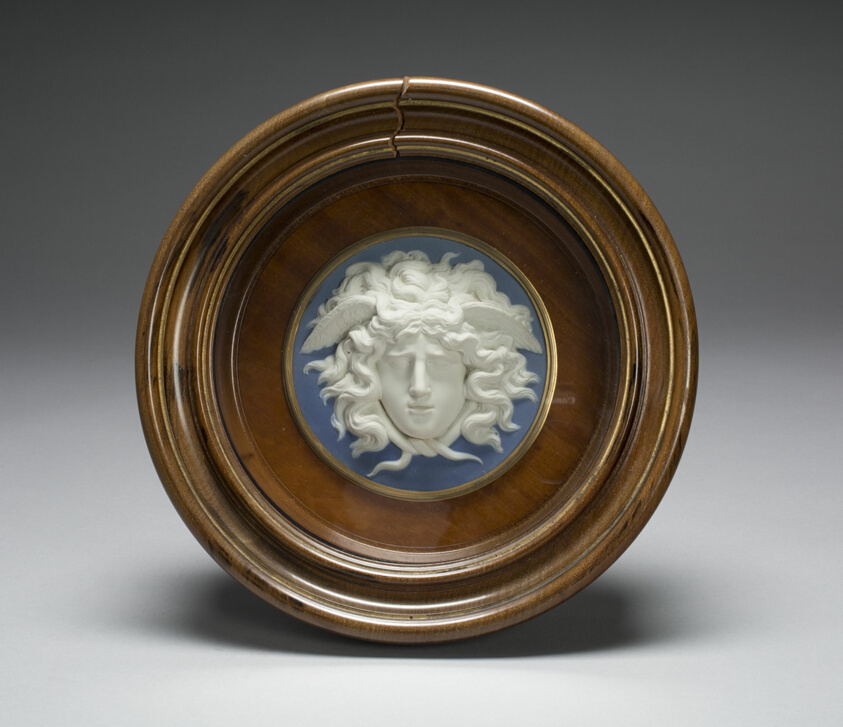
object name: Ceramics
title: Medusa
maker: Wedgwood Manufactory; England, founded 1759; Modeled by John Flaxman, Jr.; English, 1755-1826; Etruria, Staffordshire, England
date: 1775/80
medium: Stoneware (jasperware), gilded wooden frame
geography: Etruria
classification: sculpture; stoneware; european decorative arts; ceramics